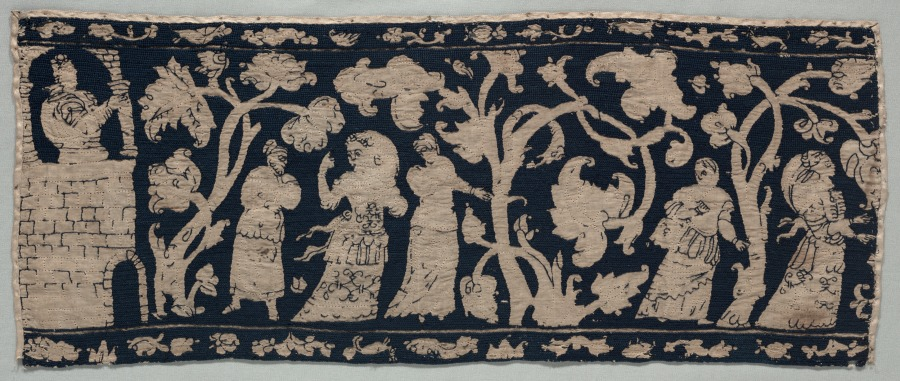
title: Embroidered Border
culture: Italy, 16th-17th century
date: 1500s-1600s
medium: embroidery; silk on linen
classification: Embroidery